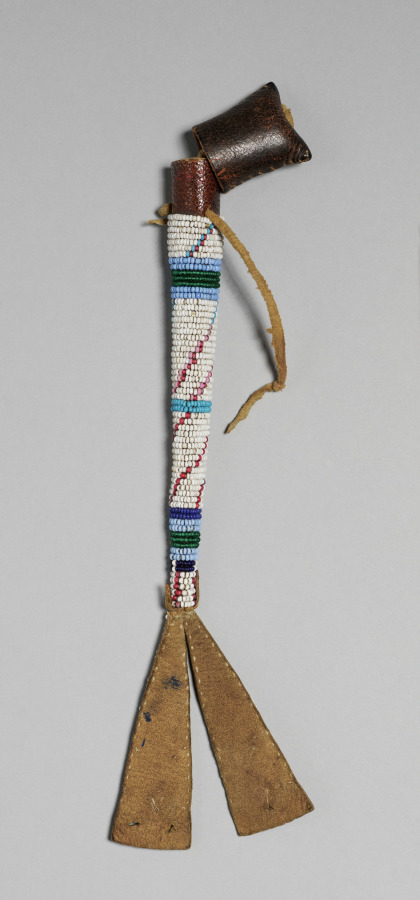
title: Beaded Awl Case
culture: America, Native North American, Gaigwu (Kiowa), Post-Contact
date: late 1800s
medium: leather, beads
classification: Leather